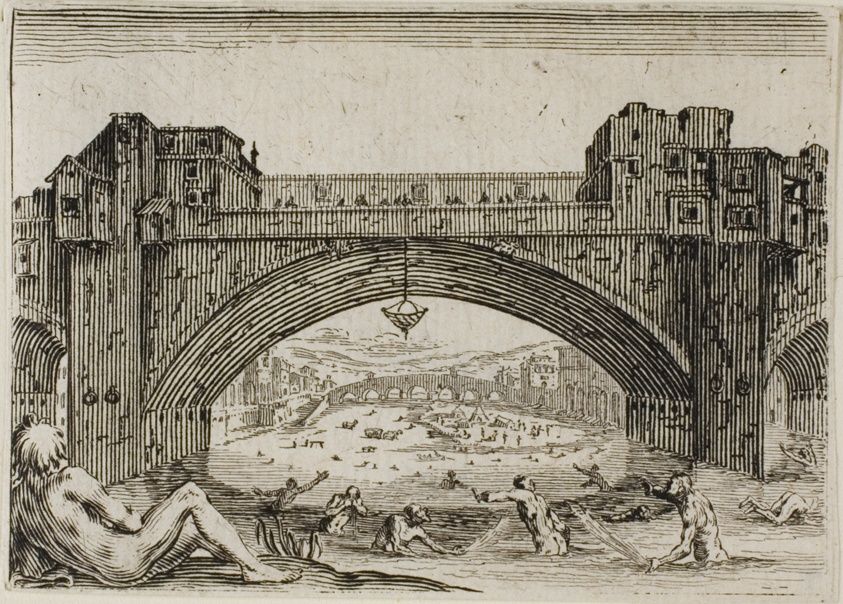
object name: Print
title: The Ponte Vecchio in Florence, from The Caprices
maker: Jacques Callot (French, 1592-1635)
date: c. 1622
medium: Etching on ivory laid paper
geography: France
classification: etching; print; prints and drawing